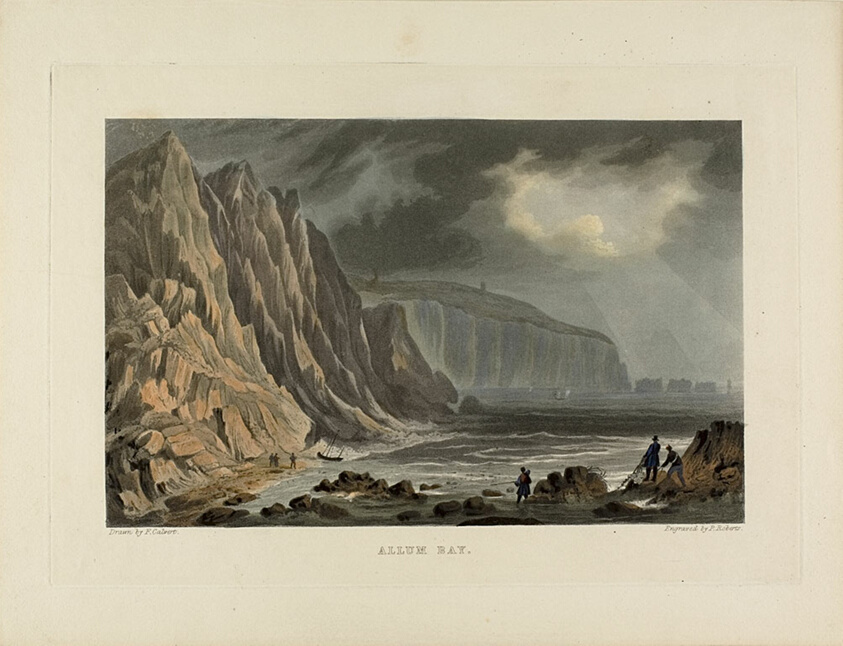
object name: Print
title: Allum Bay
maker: P. Roberts (English, 19th century); after Raisey Calvert (English, died 1794)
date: c. 1794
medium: Color aquatint on paper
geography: England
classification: aquatint; print; prints and drawing